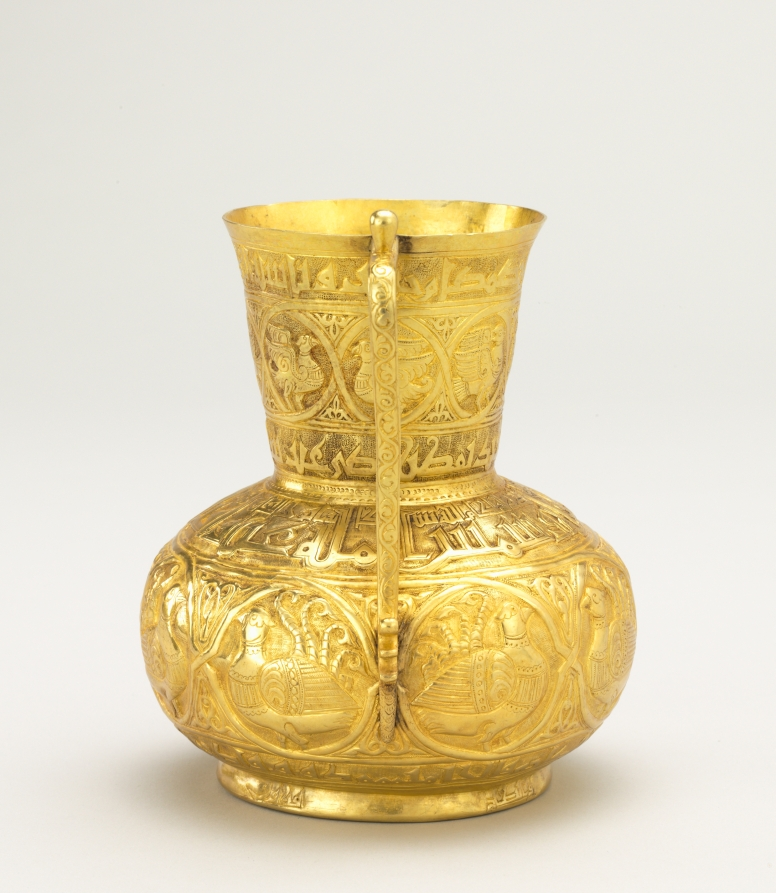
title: Jug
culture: Iran or Iraq, Baghdad, Buyid Period, reign of Samsam al-Dawla (985-998 AD)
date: late 900s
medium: gold with repoussé and chased and engraved decoration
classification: Metalwork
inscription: The inscription bands contain Arabic poetry which translates, in part: "You are the image of the full moon at night, the first gleam of sun on the horizon of the morning. You are a sword in the times of war, a beneficent rain in times of peace...your sword cuts the necks of Buyid enemies in great quantities...Glory and prosperity to the just king Samsam al-Dawla...May God lengthen your reign!"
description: This jug is one of the rare surviving Islamic vessels made entirely of precious metal. Its inscription bands contain Arabic poetry that translates, in part: "You are the image of the full moon at night, the first gleam of sun on the horizon of the morning. You are a sword in the times of war, a beneficent rain in times of peace . . . your sword cuts the necks of Buyid enemies in great quantities . . . Glory and prosperity to the just king Samsam al-Dawla . . . May God lengthen your reign!"